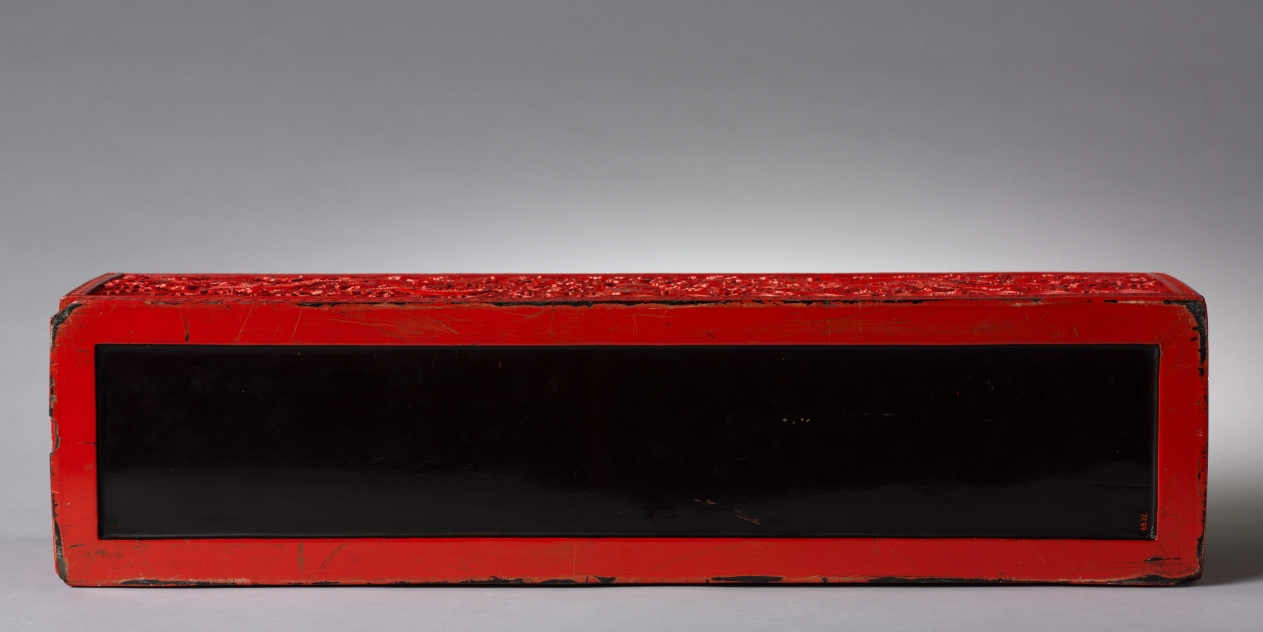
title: Carved Lacquer Scroll Box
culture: China, Qing dynasty (1644–1911), Qianlong reign (1736–95)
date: 1736–95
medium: Red carved lacquer on wood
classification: Lacquer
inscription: 心寫治平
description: The elaborate design, superior craftsmanship, and inscription carved into the red cinnabar lacquer proclaim the imperial pedigree of this scroll box. On either end is a five-clawed dragon, a design reserved only for an emperor. More dragons twist and wind through swirling clouds and waves along the length of the box’s sides and top. The carving is intricate and vigorous, while the design is controlled and regular. This box housed the private portraits of the Qianlong Emperor, his empress, and 11 other favorites among his presumed 40 or more wives during his 60-year reign. It was commissioned to be made in Suzhou when no more portraits were added to the scroll. An entry in the imperial workshop records relates to the Cleveland box. It states that in 1787, a box design with a dragon pattern, including the inscription, In his heart is envisioned a peaceful reign, was sent to a Suzhou workshop. Imperial portraits were collected in the Chonghua Palace in the Forbidden City, and the emperor’s portrait was kept in this red lacquer box from Suzhou.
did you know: This is the original box for the handscroll Portraits of the Qianlong Emperor and His Twelve Consorts, CMA 1969.31.